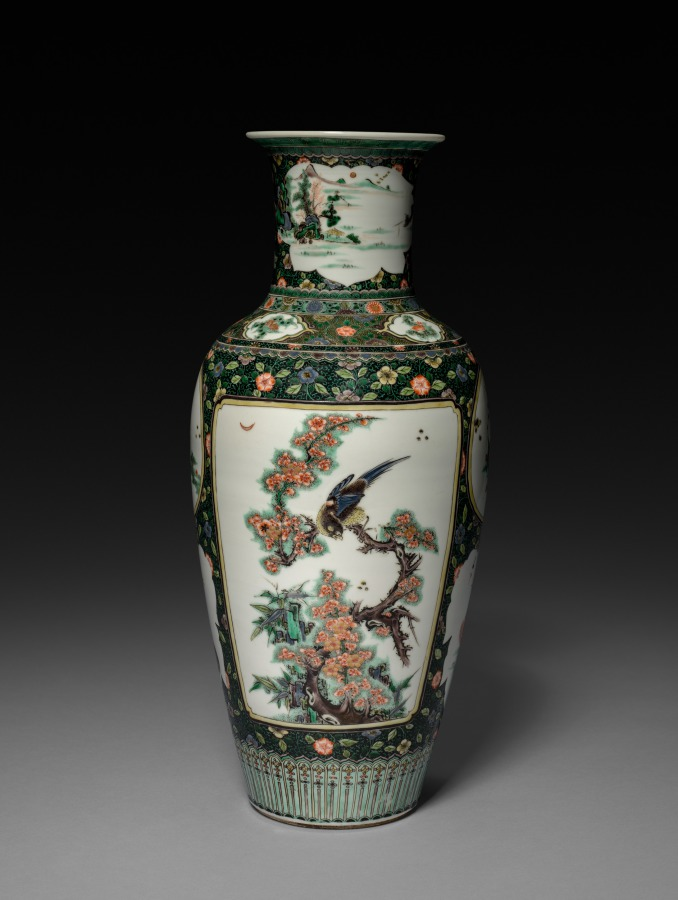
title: Baluster Vase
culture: China, Qing dynasty (1644-1911), Kangxi reign (1661-1722)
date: 1662–1722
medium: porcelain with famille verte overglaze enamel decoration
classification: Ceramic